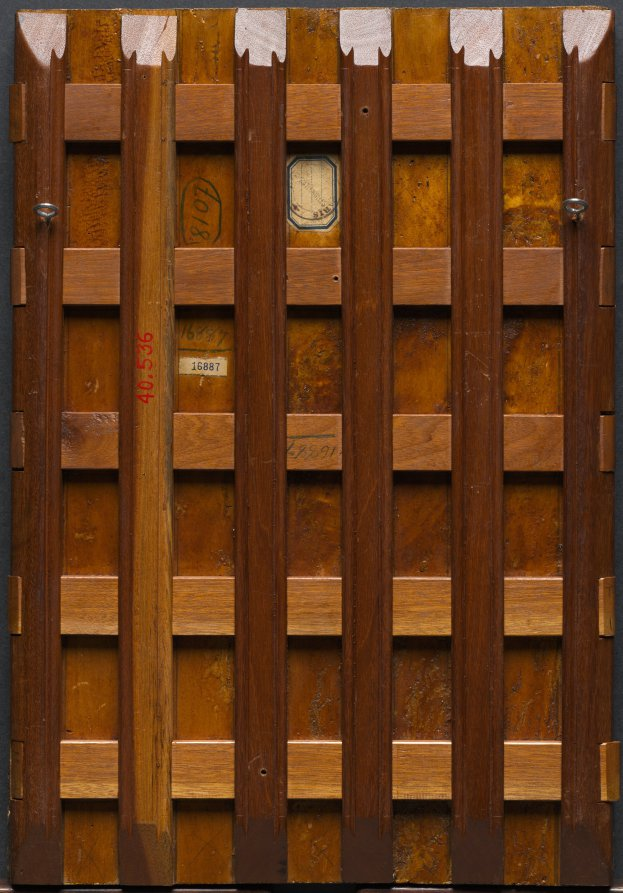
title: Virgin and Child Enthroned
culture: Italy, 19th century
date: 1800s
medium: oil on wood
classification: Painting